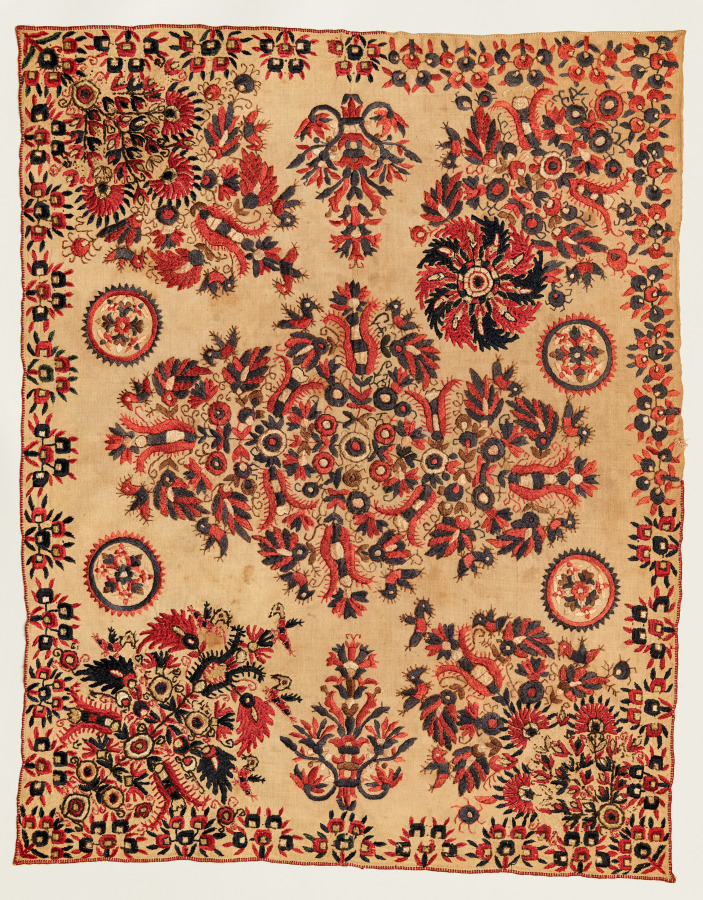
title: Fragment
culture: Africa, North Africa, Algeria, Algerian embroiderer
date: 1800s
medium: Linen, silk, dye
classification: Embroidery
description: This woven linen textile is decorated with silk-thread embroidery in several colours. The initial composition layout consists of dark red and navy blue florals along three sides of of the textile, with a "pinwheel" in the fourth. A second layer of embroideries seems to have been added, filling all of the empty spaces with additional florals and small medallions in an orange and slate blue colour palette.